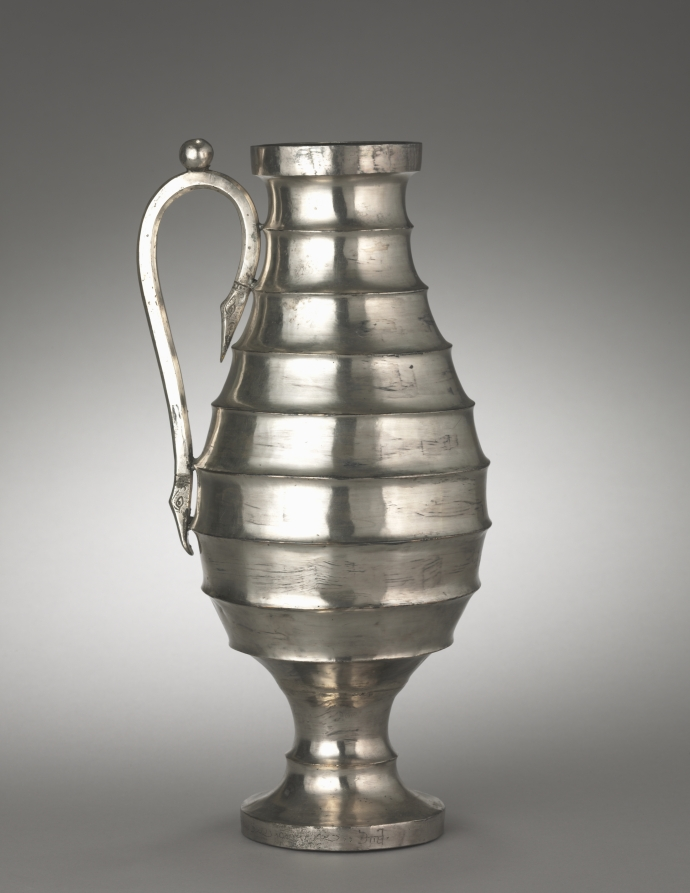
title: Stepped Pitcher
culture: Iran, Sasanian Empire (224–651 CE)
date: 400–600 CE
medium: silver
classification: Metalwork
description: The Sasanians are best known today for their expert work in silver. This museum is fortunate to have one of the most important collections of Sasanian silver vessels in the world.